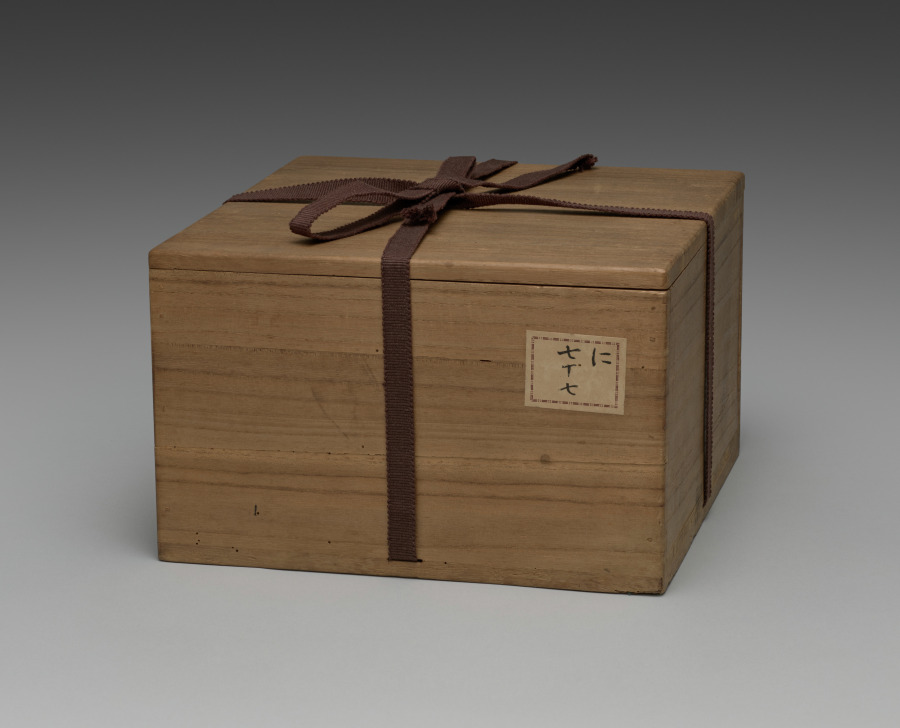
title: Sweets Bowl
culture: Japan, Meiji period (1868–1912)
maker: Seifū Yohei III (Japanese, 1851–1914)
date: 1893–1914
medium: Porcelain with green glaze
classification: Ceramic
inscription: 彫銘：清風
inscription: 共箱の箱書：（蓋裏）秘色窯菓子鉢 三世清風晟山作（印：帝室技藝員）襲（袭）四世清風與平識之（印：清風）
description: The box for this sweets bowl has an attestation by Yohei IV that it is a work by Yohei III and in the hisokuyō (C. mise yao), or “mysterious color ware,” style. In fact, as actual examples of mise ware were unknown in Yohei III’s time, he would have associated the color with the green-glazed ceramics of kilns at Longquan, also in Zhejiang Province, produced during the Yuan dynasty.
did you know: Many ceramics created by the Seifū Studio refer to and emulate Chinese ceramics in form and glazing.